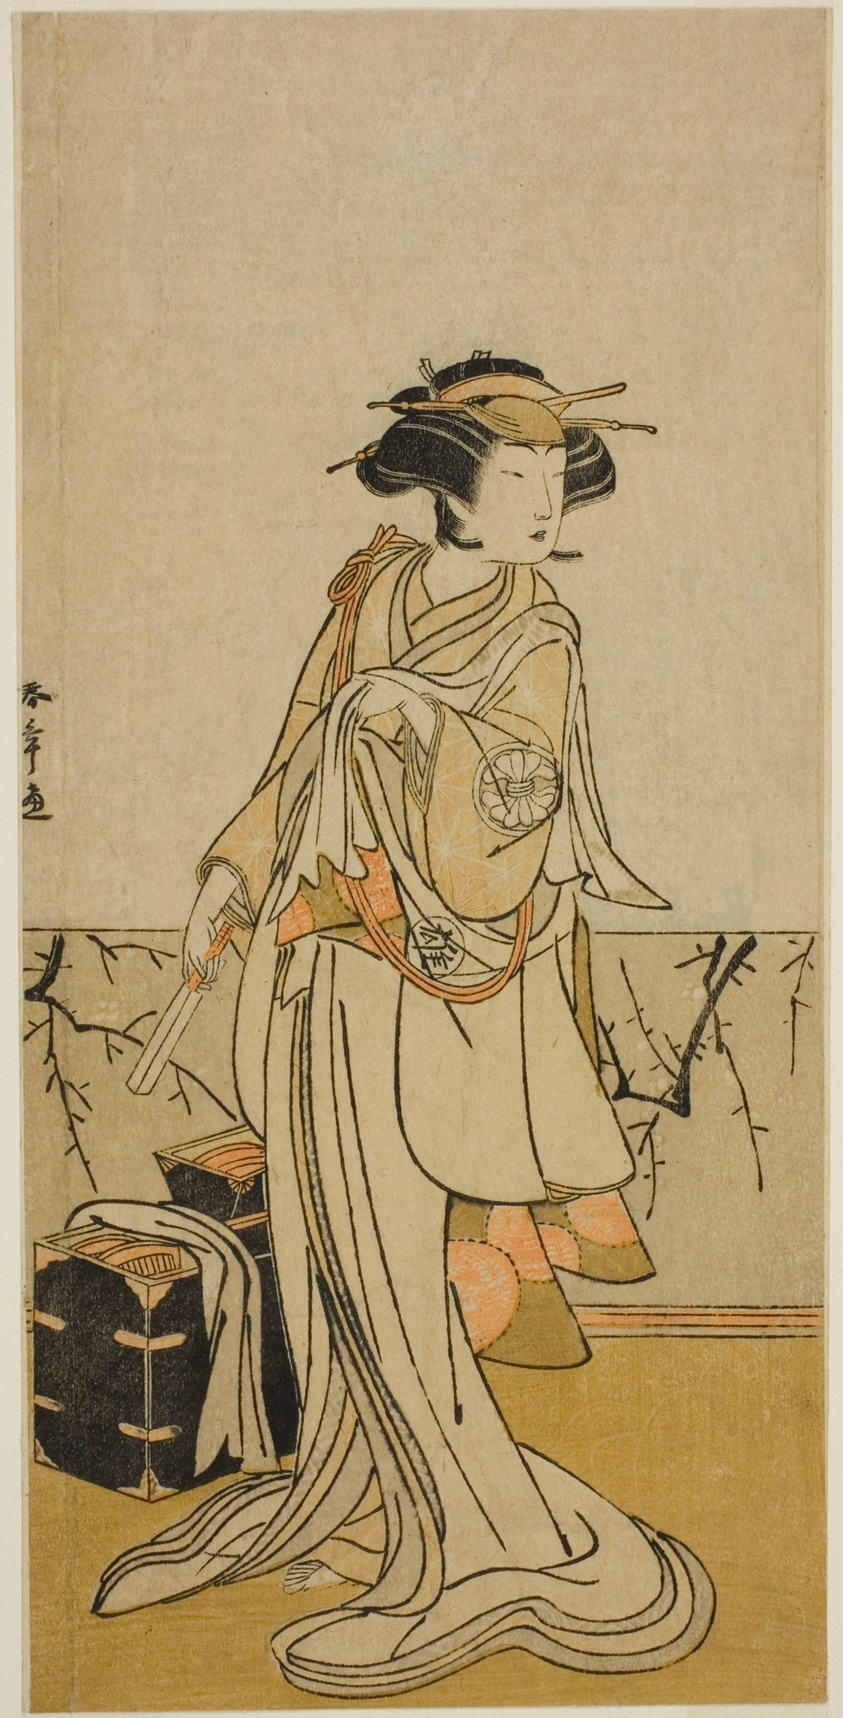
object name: Print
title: The Actor Segawa Yujiro I as Osai, a Female Hairdresser, in the Play Kamuri Kotoba Soga no Yukari, Performed at the Ichimura Theater in the First Month, 1776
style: Japanese (culture or style)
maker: Katsukawa Shunsho 勝川 春章; Japanese, 1726-1792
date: c. 1776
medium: Color woodblock print; hosoban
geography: Japan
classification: woodblock print; print; asian art